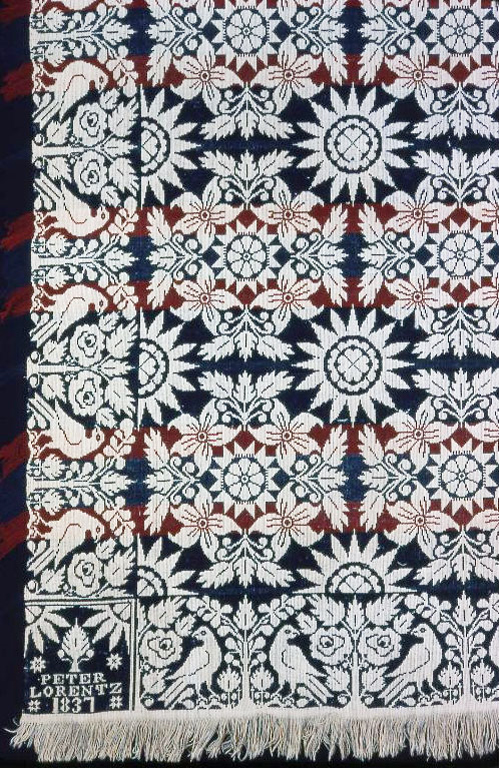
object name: Textile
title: Coverlet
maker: Peter Lorentz (American, born French, 1801-1876); United States, Ohio, Montgomery County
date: 1837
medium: Cotton and wool, plain weave with plain interlacings of secondary binding warps and patterning wefts (Beiderwand); woven on loom with Jacquard attachment; two loom widths joined; warp and weft fringe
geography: Ohio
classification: weaving - coverlet; coverlet; textile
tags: coverlet, trees, birds, stars, flowers, lilies, wreaths